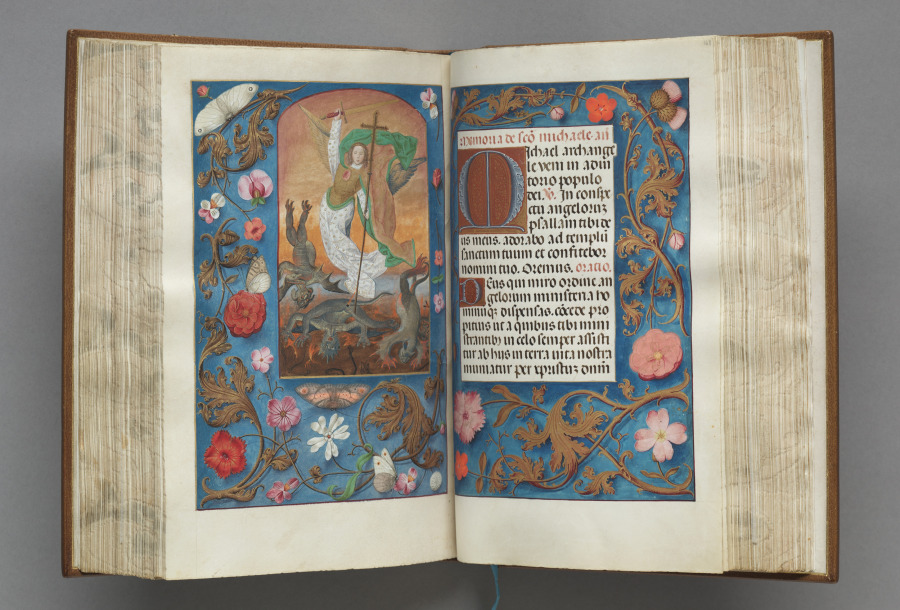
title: Hours of Queen Isabella the Catholic, Queen of Spain: Fol. 168r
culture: Flanders, Ghent and Bruges, late 15th century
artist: Master of the First Prayerbook of Maximillian (Flemish, c. 1444–1519)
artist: and Associates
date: c. 1500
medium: ink, tempera, and gold on vellum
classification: Bound Volume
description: This manuscript was illuminated by a circle of at least five highly organized manuscript painters active in the Flemish cities of Ghent and Bruges. The principal illuminator was Alexander Bening, who painted the majority of the book's miniatures. Manuscripts produced by this circle of artists are renowned for the decoration of their borders, which typically feature a rich variety of realistically-painted flowers, birds, and butterflies. This prayer book, called a book of hours, was intended not for a cleric, but for the private devotions of a lay person-in this case, Isabella the Catholic, Queen of Spain (1451-1504). Isabella's coat of arms embellishes the book's frontispiece. It is unlikely that the book was commissioned by the Queen herself; rather, she probably received it as a diplomatic gift from someone courting her patronage, perhaps Cardinal Francisco Jimenez de Cisneros. A Franciscan friar, Jimenez was dependent upon Isabella for his advancement, first to the post of Queen's confessor in 1492, and then to Archbishop of Toledo in 1495.